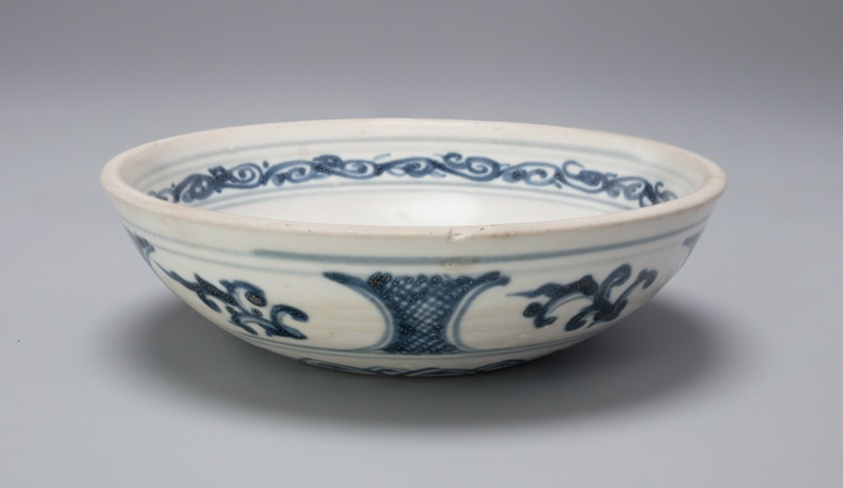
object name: Vessel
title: Small Bowl with Floral and Foliate Motif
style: annamese, vietnamese, Southeast Asian, asian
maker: Vietnam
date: Late 14th/15th century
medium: Glazed stoneware with cobalt-blue underglaze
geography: Vietnam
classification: ceramics; asian art; vessel